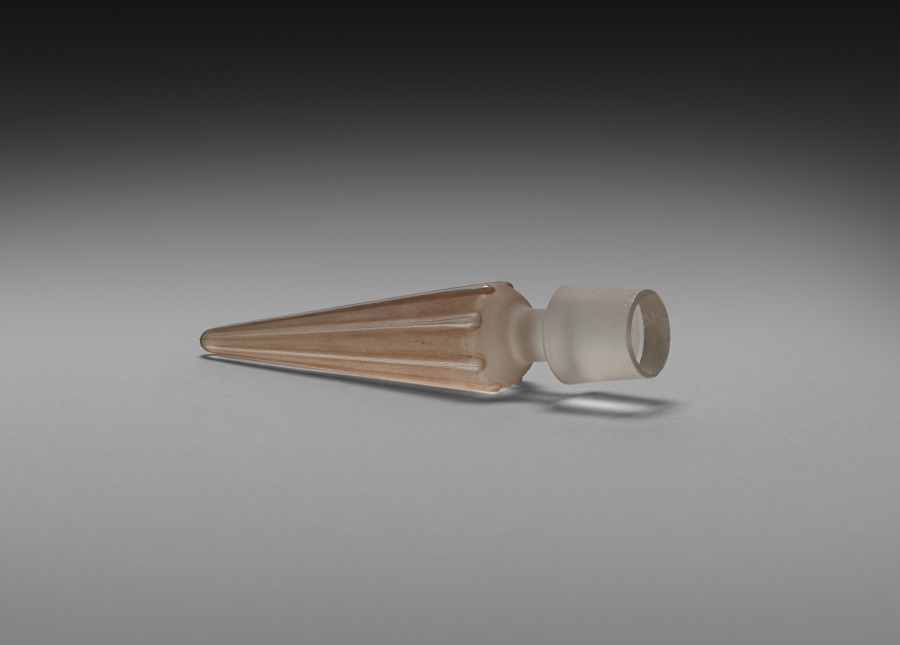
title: Stopper for a Mermaids and Frogs Decanter (Carafe sirènes et grenouilles)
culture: France, 20th century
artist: René Lalique (French, 1860–1945)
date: 1917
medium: glass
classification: Glass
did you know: The title of this work translates to mermaids and frogs carafe.